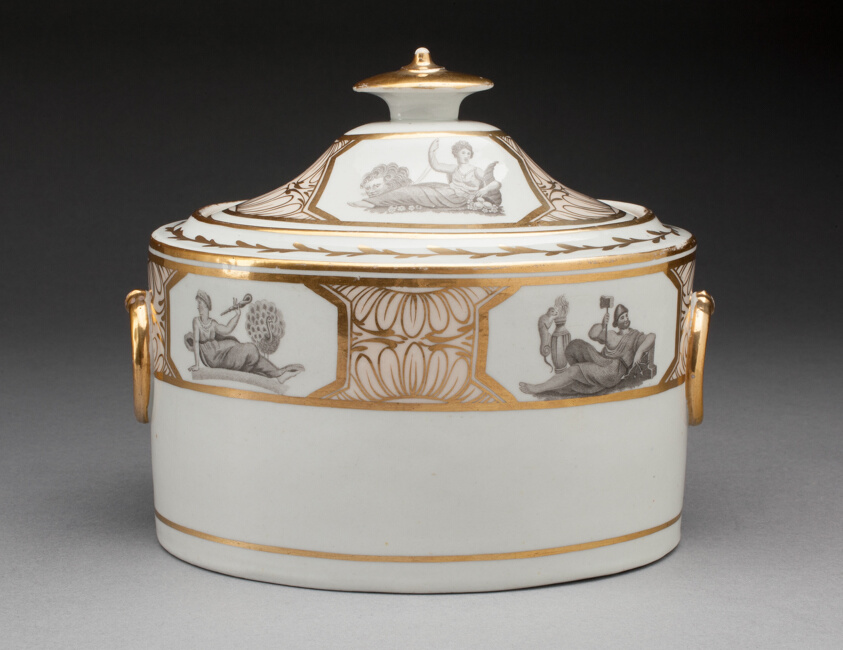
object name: Ceramics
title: Sugar Bowl with Cover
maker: Worcester Porcelain Factory (Flight & Barr Period, 1792–1804); Worcester, England, founded 1751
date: c. 1800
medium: Soft-paste porcelain with monochrome gray and gilding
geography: Worcester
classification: sugar bowl; teaware; porcelain; european decorative arts; ceramics